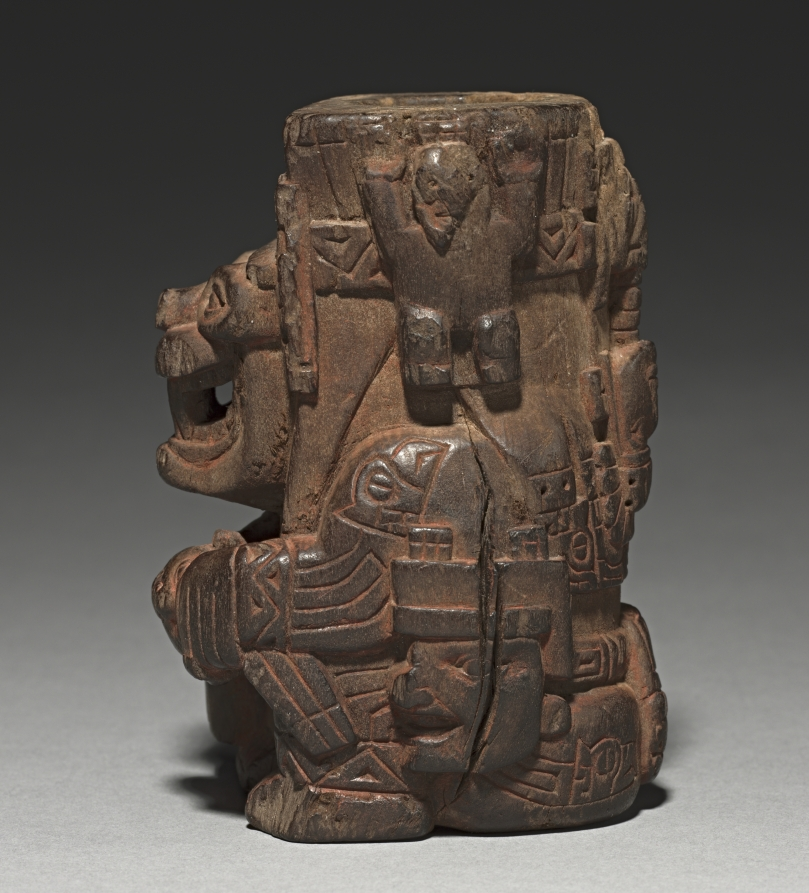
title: Sacrificer Container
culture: Central Andes, Wari style (600-1000)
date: 770–890 (radiocarbon date, 95% probability)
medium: wood and cinnabar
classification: Wood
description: This container assumes the shape of a magnificent, feline-headed, supernatural sacrificer who draws a knife across the throat of the human it holds in its lap. Severed human heads hang from the feline's belt and dangle by the trachea at the back of its headdress. Sacrifice had a place in Wari religious practice, probably as an unusual and exceptionally precious offering made to entice the benevolence of cosmic forces. Indeed, colonial-period Andean people believed that death was a prerequisite for the renewal of the world.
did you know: Traces of cinnabar, a toxic mercuric sulfide, are visible on the container's surface.